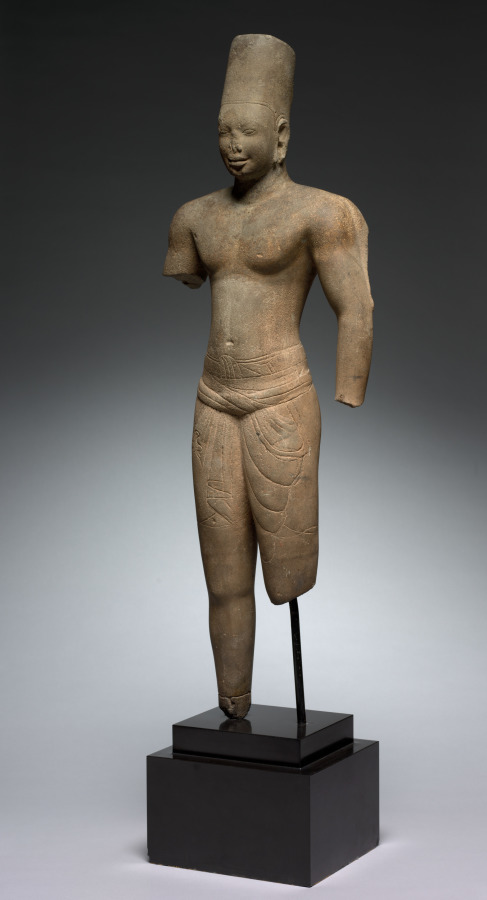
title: Vishnu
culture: Cambodia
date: 650–99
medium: gray sandstone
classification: Sculpture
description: The muscular physique, sensitive smile, and flat-topped high crown are characteristics of Vishnu images made during the pre-Angkorian period (c. 550–802) in Cambodia. This sculpture probably was the sole object of worship in a small brick temple sanctum.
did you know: The god wears a short garment (sampot) tied to form a loop on the left with the hanging ends on the right thigh.